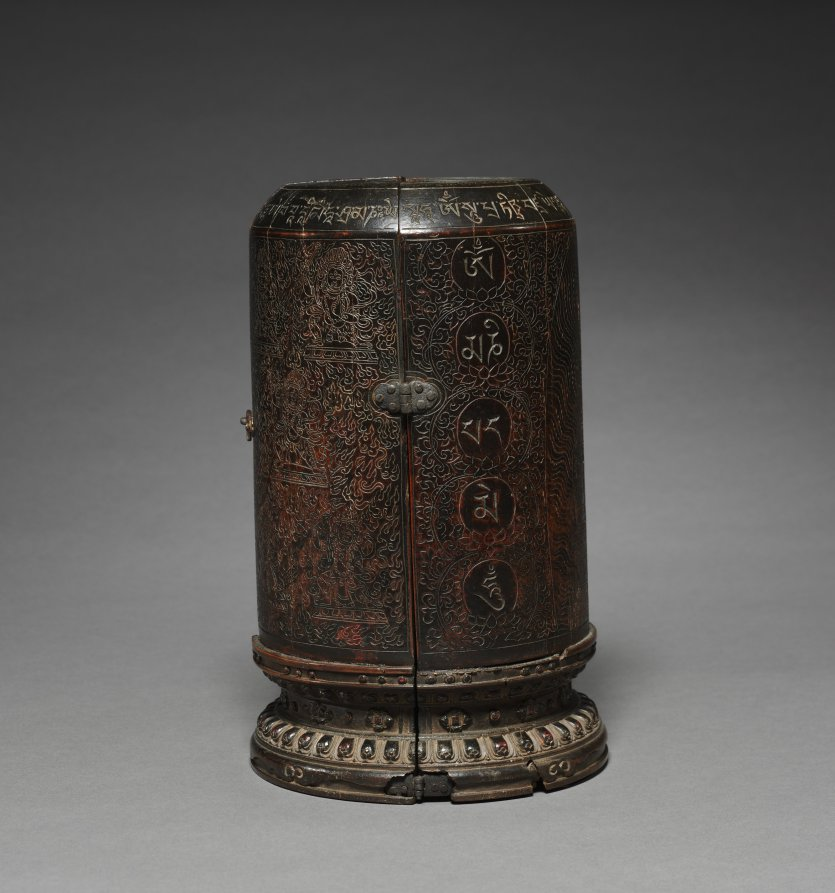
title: Portable Shrine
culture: Tibet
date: c. 1500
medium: wood with mineral pigments and metal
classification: Sculpture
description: Carved from a solid section of a log, the shrine contains images of protectors of tantric Buddhism—a branch that developed in northern India and became prominent in the Himalayas by the 700s. The central figure in the top row is Padmasambhava (Indian, active in Tibet in the 740s), venerated as the founder of one of the four main Tibetan monastic orders. Incised on the exterior are images of protectors, mantras written in Tibetan script, and a sacred funerary monument called a stupa. Tantric practice emphasizes recitation of mantras that invoke the powers of compassion, wisdom, and protection.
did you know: Tantric practice can be performed alone in any location; this shrine could be used by a traveling practitioner for meditation, visualization, prayer, and recitation of mantras.